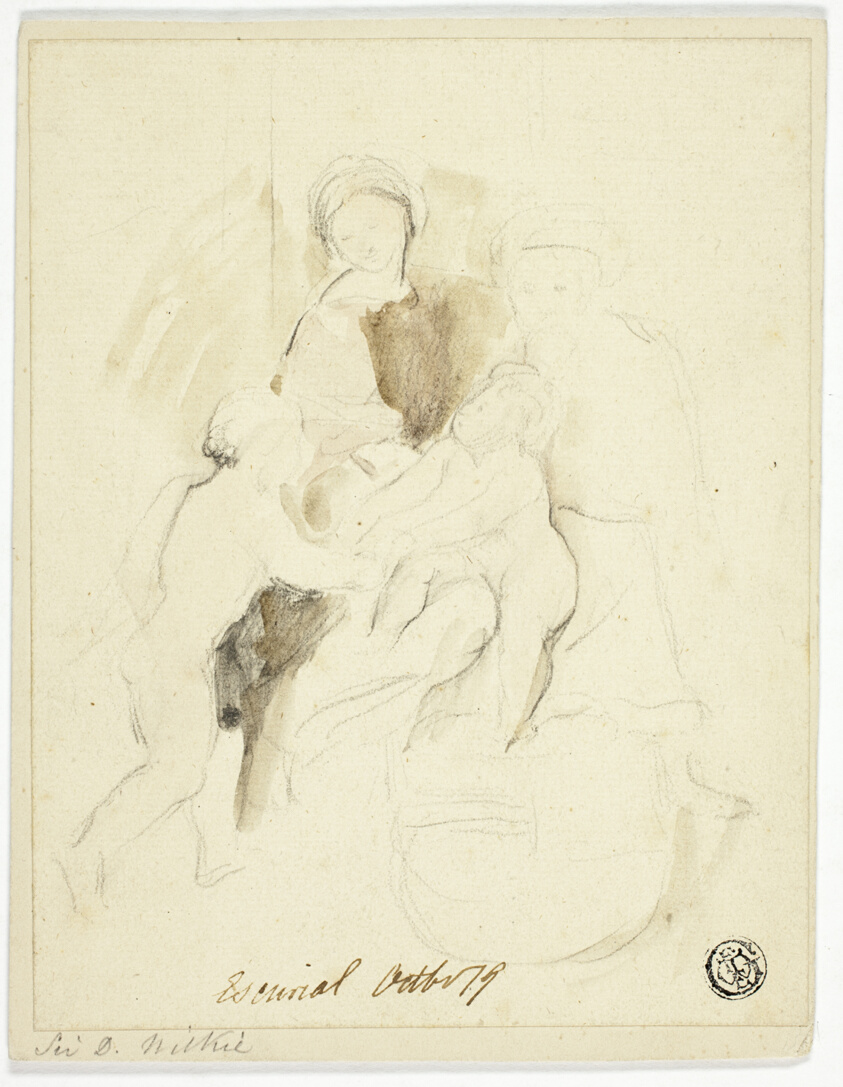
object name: Drawing and Watercolor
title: Holy Family in the Escorial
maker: Sir David Wilkie; Scottish, 1785–1841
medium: Black chalk and watercolor on cream laid paper, laid down on cream card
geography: Scotland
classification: chalk; watercolor; paper; drawings (visual works); prints and drawing